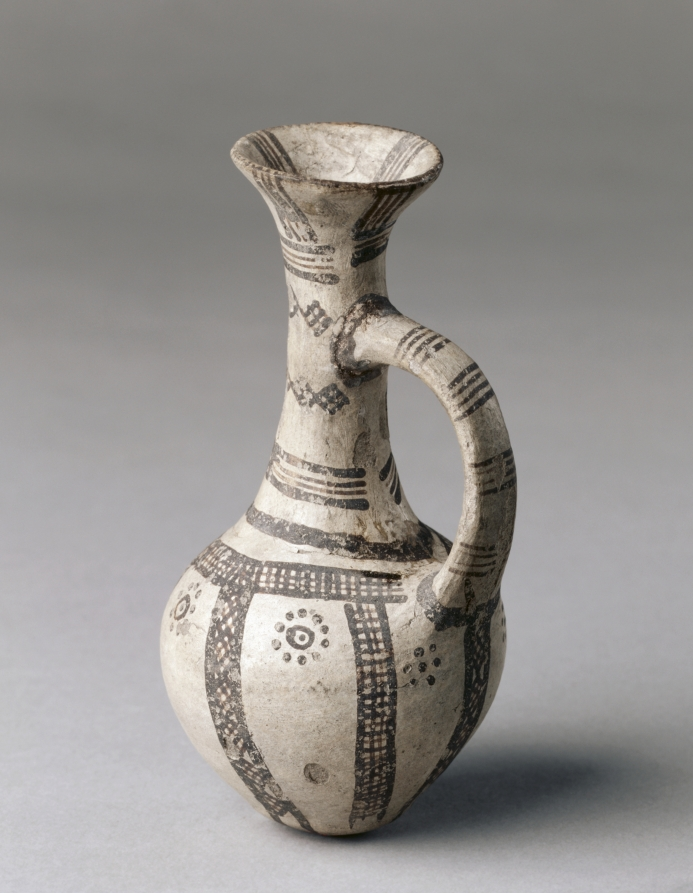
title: Jug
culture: Cyprus, late Cypriot II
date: c. 1450–1200 BCE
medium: white slip ware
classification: Ceramic